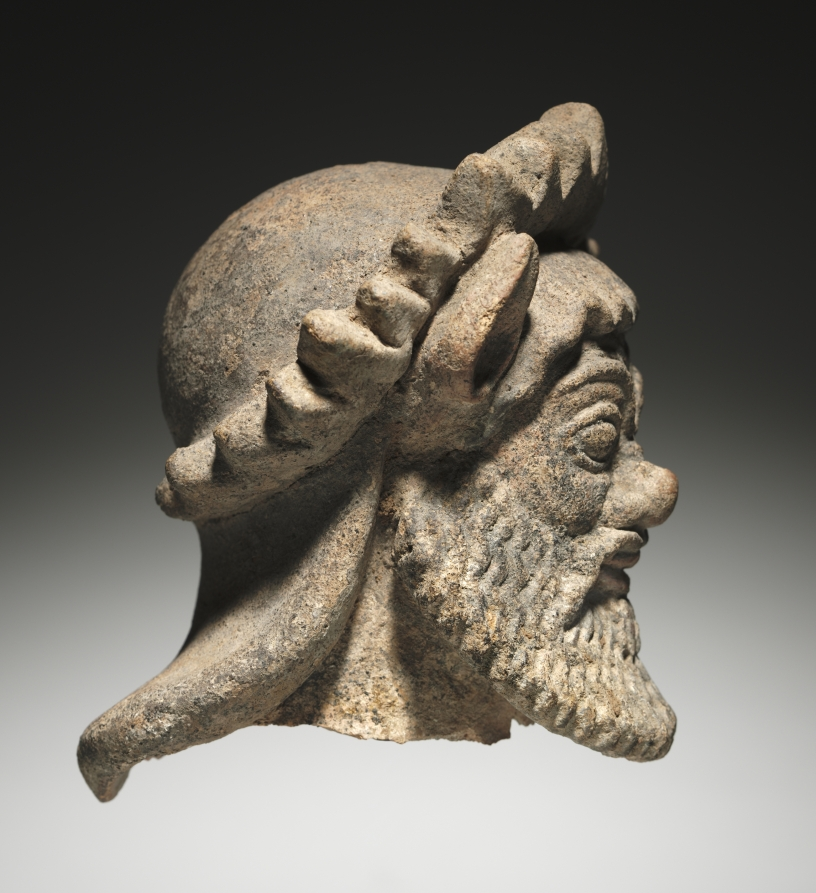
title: Satyr Head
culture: Etruscan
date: 500s BCE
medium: terracotta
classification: Sculpture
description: This head of an equine-eared satyr likely comes from a mold-made terracotta antefix. He has a wide nose, a furrowed brow, and almond-shaped eyes. Traces of pigment remain in the wavy incised beard and lips. A garland, perhaps made of pointed leaves, adorns the hair. It was likely part of a larger Etruscan temple antefix of an intertwined satyr and maenad because of its identical nature to other satyr heads from complete antefixes.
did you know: Satyrs are nature spirits and followers of the wine god Dionysos.